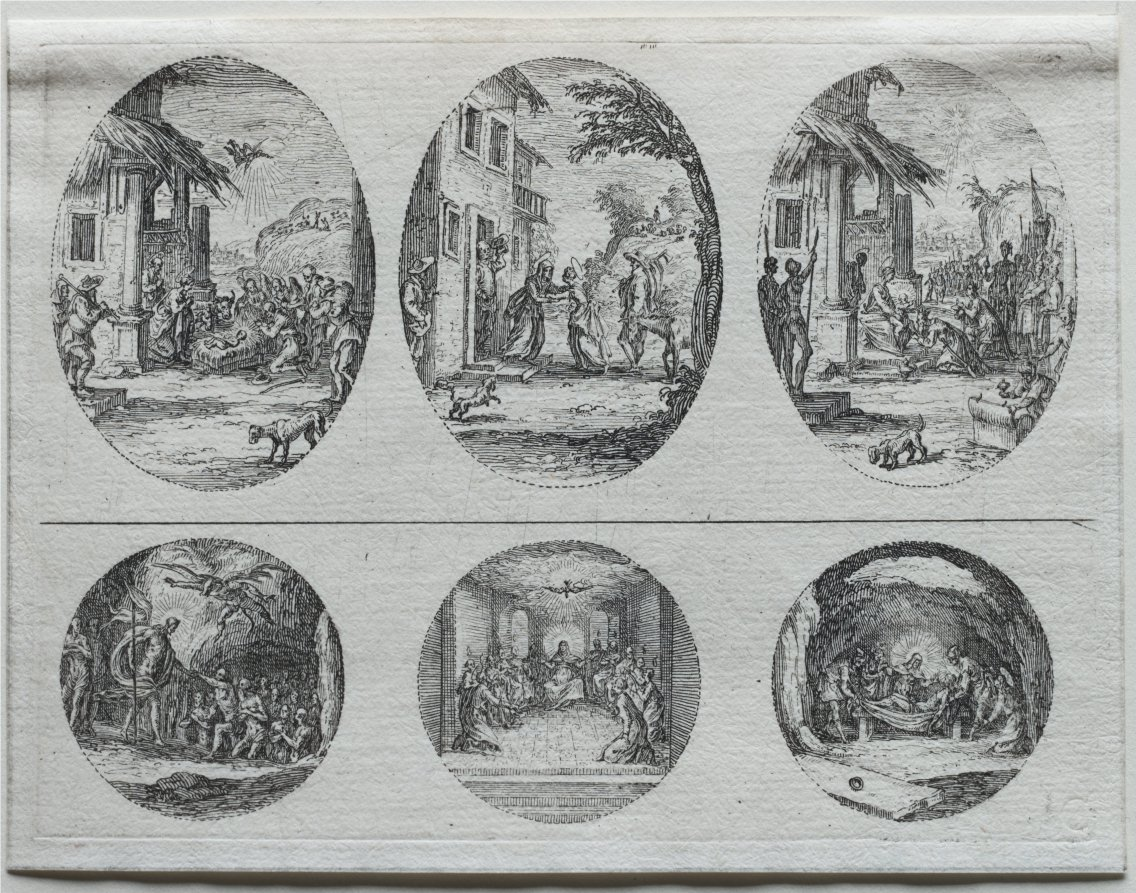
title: The Mysteries of the Passion: The Adoration of the Shepherds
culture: France, 17th century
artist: Jacques Callot (French, 1592–1635)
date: 1631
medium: etching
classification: Print